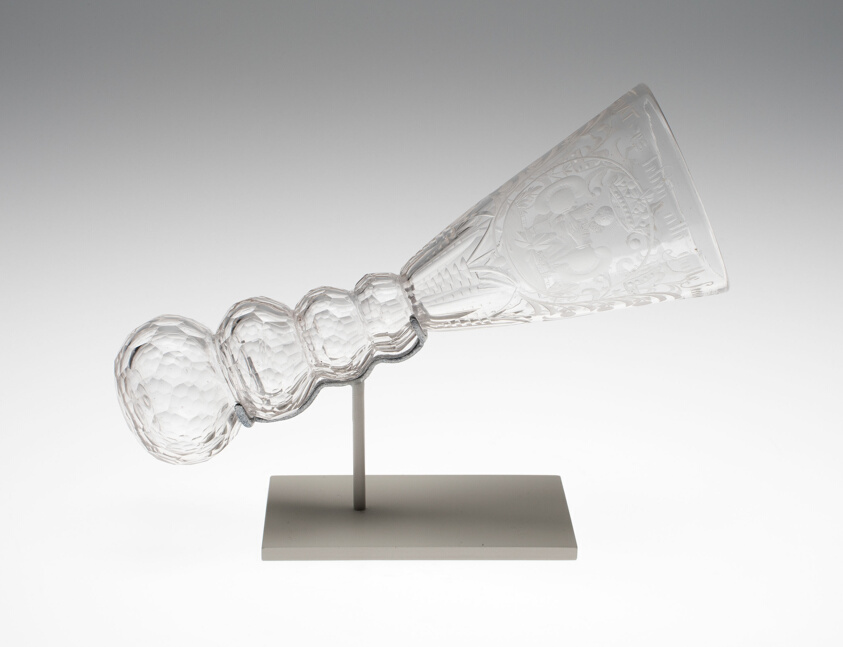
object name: Glass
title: Stirrup Glass (Sturzglas)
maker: Riesengebirge, Bohemia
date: c. 1720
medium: Glass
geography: Bohemia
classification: drinking vessel; glass; european decorative arts